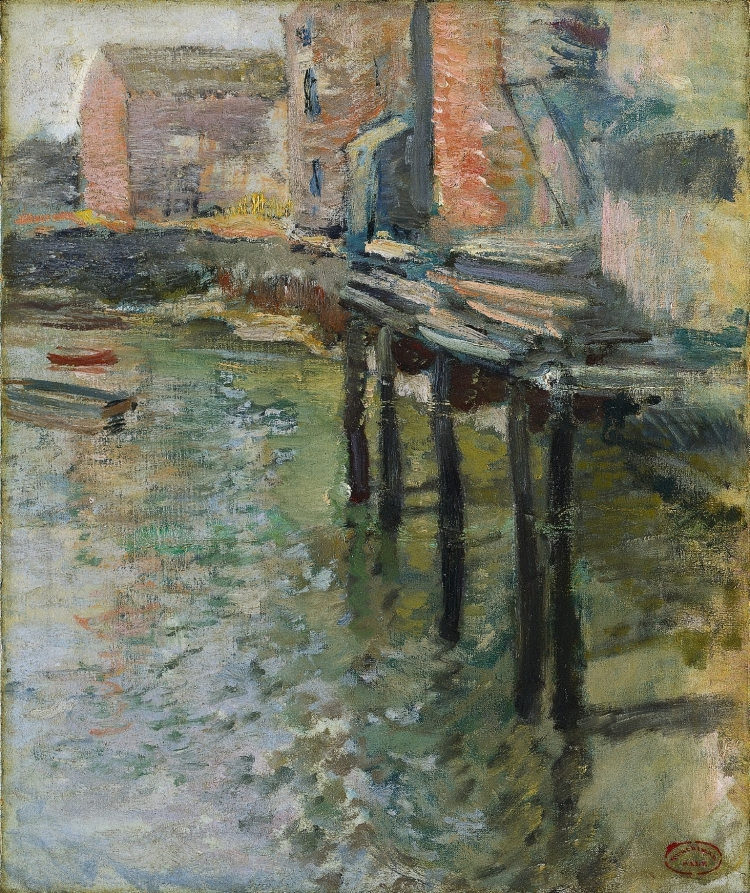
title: Deserted Wharf (The Old Mill at Cos Cob)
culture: America, late 19th Century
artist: John Henry Twachtman (American, 1853–1902)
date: before 1899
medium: oil on canvas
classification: Painting